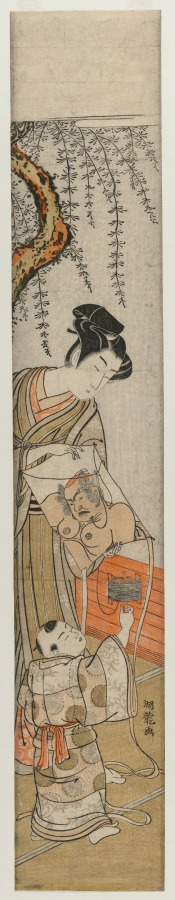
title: Young Man and Child with a Kite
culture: Japan, Edo period (1615–1868)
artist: Isoda Koryūsai (Japanese, 1735–1790)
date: early-mid 1770s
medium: color woodblock print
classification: Print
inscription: Signature: Koryu ga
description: Kite-flying is a popular sport in Japan, especially during the New Year's festival. Fanciful kite forms include birds, butterflies, double fans, and portraits of heroes. Traditionally, only boys and men fly kites in Japan.